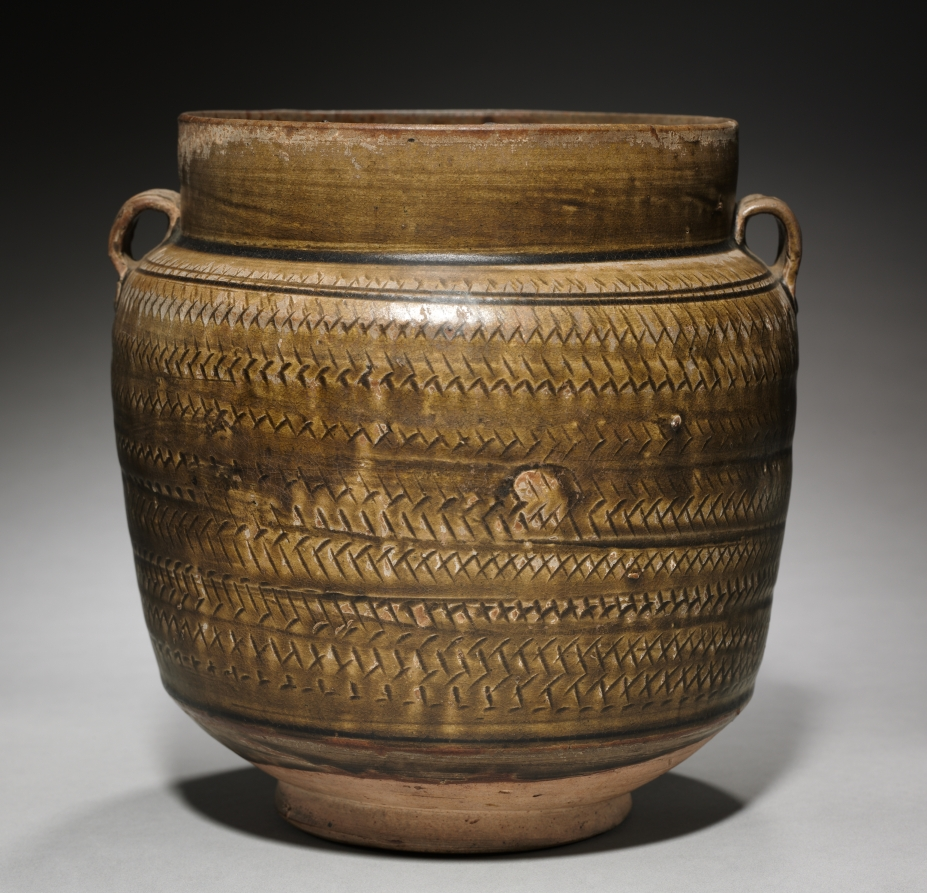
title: Jar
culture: China, Northern, Tang dynasty (618-907) - Five dynasties (907-960)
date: 800s–900s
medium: Glazed pinkish-buff stoneware; Brown ware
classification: Ceramic